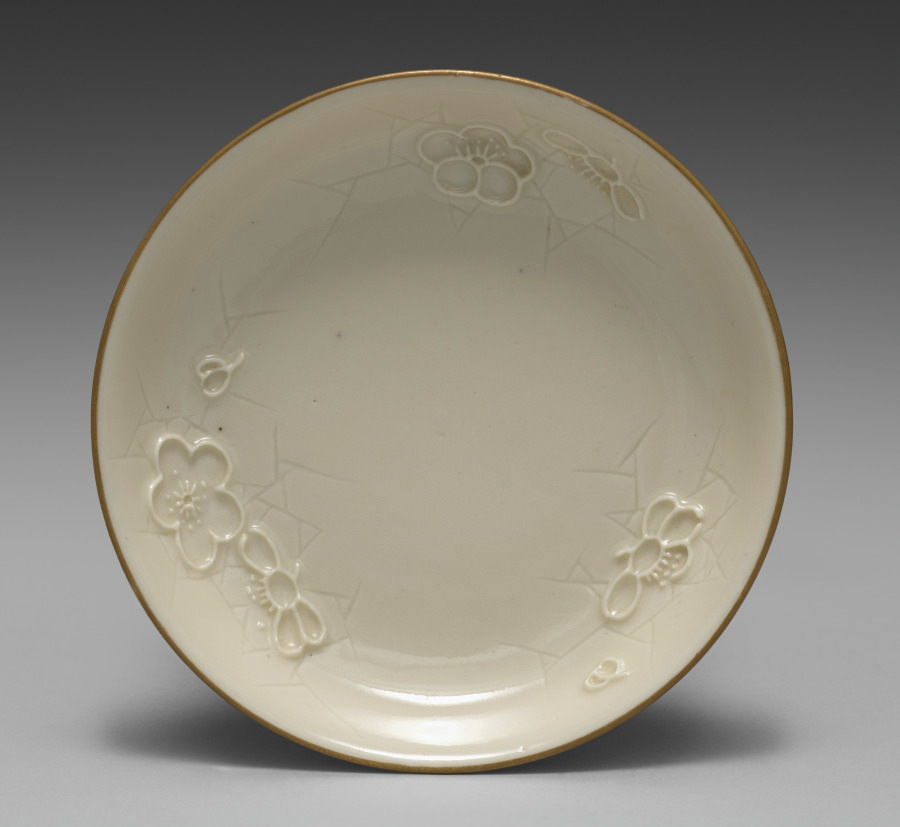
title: Small Dish from Dining Set with Plum Blossoms and Cracked-Ice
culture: Japan, Meiji period (1868–1912)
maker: Seifū Yohei II (Japanese, 1844–1878)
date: c. 1875–78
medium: Porcelain with molded designs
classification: Ceramic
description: Each item in this set has a delicate low-relief design of flowering plum branches over scattered, intersecting lines meant to resemble the cracked-ice surface of a frozen body of water and is signed on the base in gold pigment. While Yohei II produced many fine works in underglaze blue, like those produced by Kiyomizu Shichibei, he also made works in quite different styles later in his career, from the early 1870 s. In 1873, he was appointed purveyor to the Industrial Center of Kyoto Prefecture, a designation associated with Kyoto’s efforts to reach an international market through the port of Kobe; and from 1875 until his death, he was involved in national-level projects to present Japanese ceramics across the world. It was during this period that Yohei III was apprenticed to Yohei II, and it has been suggested that this set may in fact be an early example of Yohei III’s work, which he signed with his teacher’s name. Decorated with flowers resembling Japanese textile motifs, the set calls to mind the design of Yohei II’s pair of vases with plum blossoms in the Victoria and Albert Museum. Here, the elaborate trees created for a formal public exhibition setting have been translated into the approachable blossoms of the genteel domestic environment. While the designs are consistent across the pieces, each raised flower petal and pistil and each incised line in the ice was done by hand, so the cups, bowls, and dishes are similar yet unique. The bottoms of two boxes once identified the set’s owner, but the information has been deliberately obscured with black ink. However, inscriptions still visible appear to indicate two occasions, once at the end of July 1886 , and once again in June 1916 , when parts of the set were requested from Hokura in Niigata Prefecture. The location corresponds to a neighborhood in the present-day city of Jōetsu. The surname Tsuji 辻 also appears on a paper tag affixed to one of the box cloths. Future research may possibly reveal more about their provenance. A vase by Yohei III in a private collection combines the formal grandeur of the Yohei II vases in the Victoria and Albert Museum with the gentler design of this dining set, placing flowering plum trees against soft, scalloped-edge clouds resembling those in golden screens.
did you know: The dining wares have a creamy white coloration that the four boxes containing them identify as Korean in style.